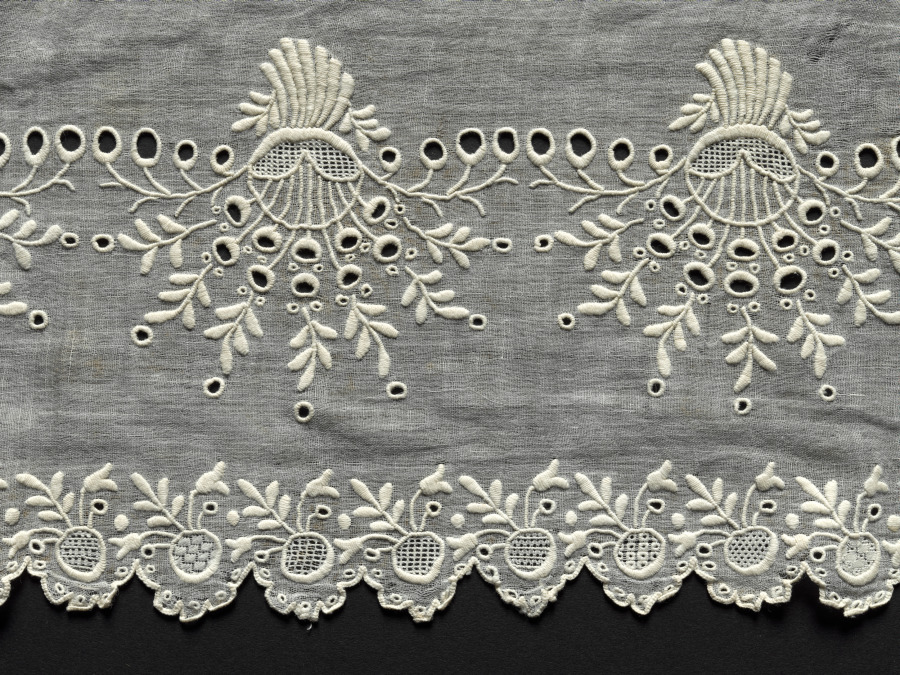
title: Portion of a Flounce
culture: Italy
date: 1800s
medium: Plain weave cotton: needle lace (drawnwork) and embroidery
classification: Embroidery